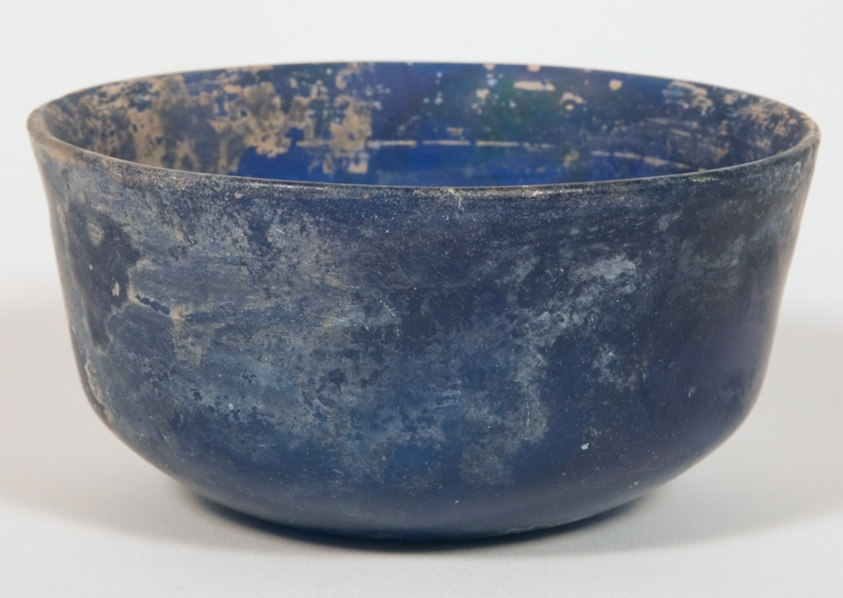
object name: Vessel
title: Bowl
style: syrian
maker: Roman, Syria or Palestine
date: late 1st century BCE-early 1st century CE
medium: Glass, sagged, rotary-polished and fire-polished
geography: Syria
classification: bowl; glass; vessel; ancient art